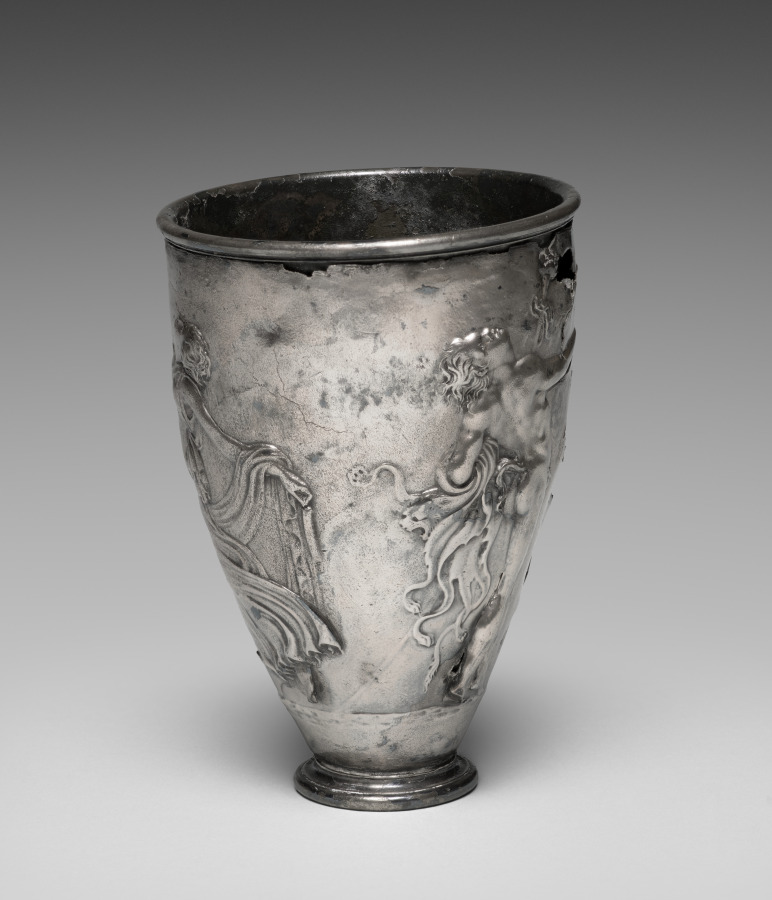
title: The Vicarello Goblet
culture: Italy, Vicarello (ancient Aquae Apollinares), Roman, Augustan period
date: 25 BCE–25 CE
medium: silver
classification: Metalwork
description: This masterpiece of the Roman silversmith’s art is exquisitely worked in relief. The multifigure scene centers on a rustic shrine of the ithyphallic fertility god Priapus, son of Dionysos. He takes the form of a stylized boundary marker atop a column, where a woman seems to have brought him to life by touching him. To the left sits a table with votive offerings to the god. Flanking the shrine are a satyr and maenad, dancing ecstatically.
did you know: This silver cup was found north of Rome at Vicarello (ancient Aquae Apollinares), probably in 1862.